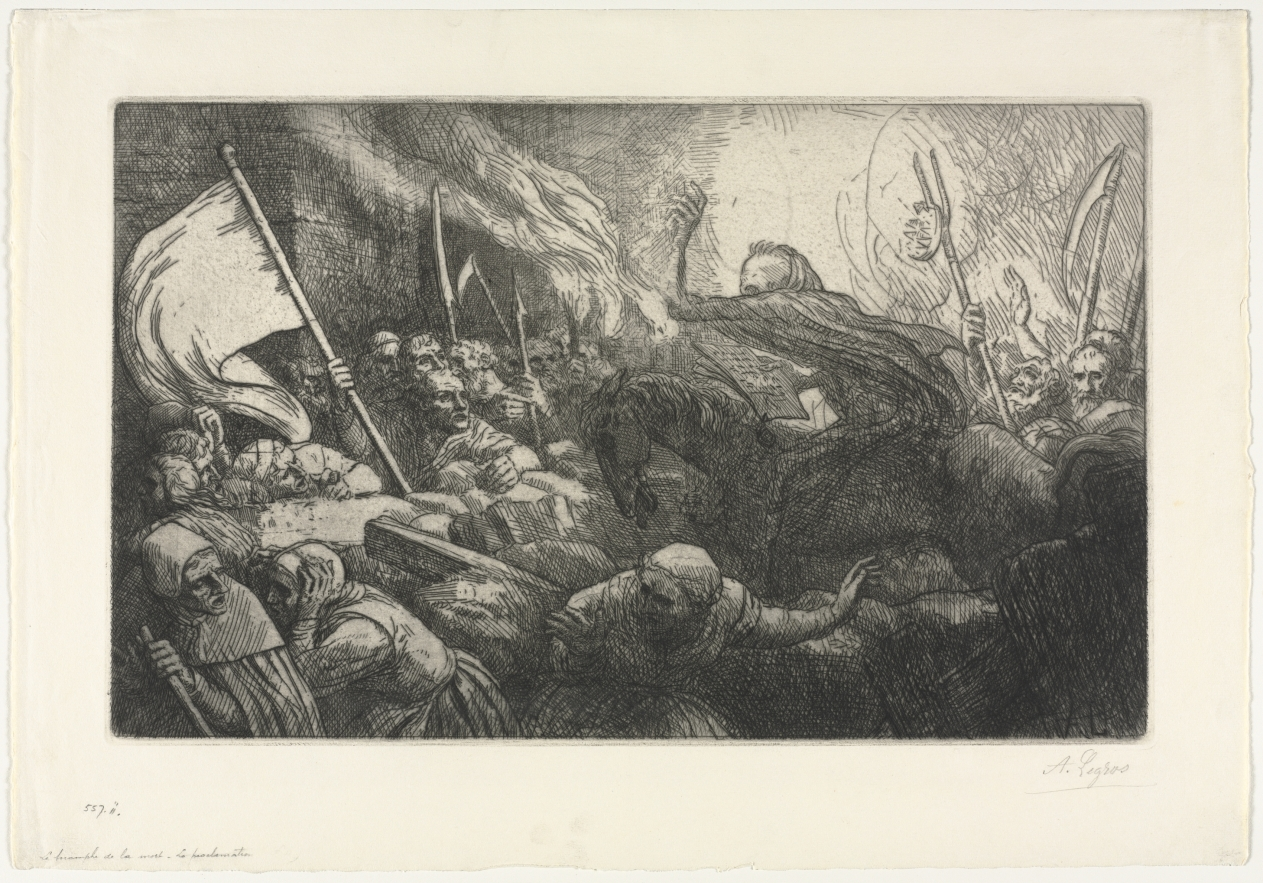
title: The Triumph of Death: The Proclamation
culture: France, 19th century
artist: Alphonse Legros (French, 1837–1911)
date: c. 1880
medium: etching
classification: Print